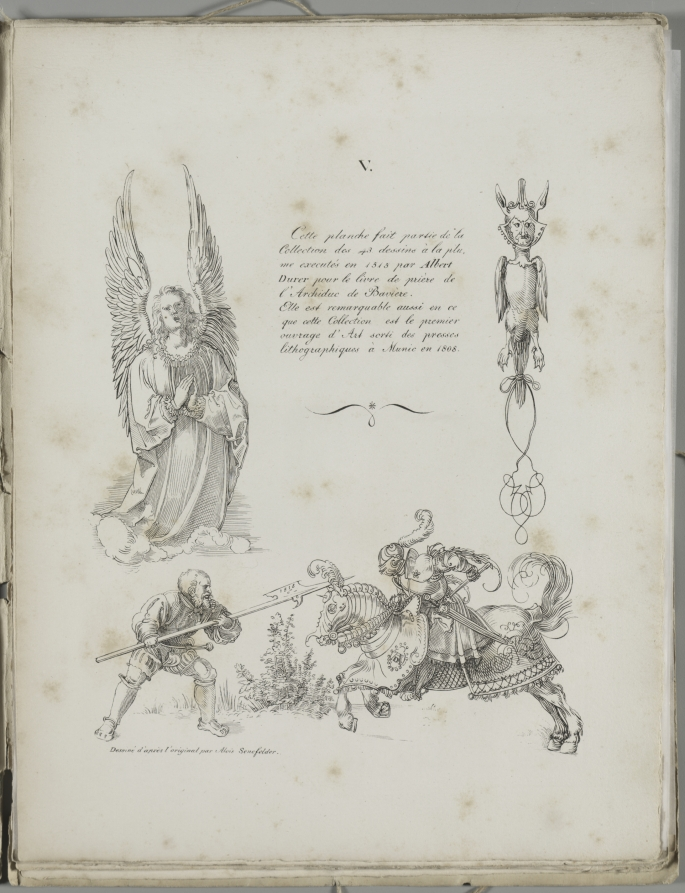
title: Art of the Lithograph: Three Designs from Dürer’s Prayer Book, Plate V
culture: Germany, 19th century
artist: Alois Senefelder (German, 1771–1834)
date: 1819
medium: lithograph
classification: Portfolio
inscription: On plate: Cette plache fait partie de la / Collection des 43 dessins a la plu- / me executés en 1515 par Albert Durer pour le livre de prière de / l’Archiduc de Bavière. / Elle est remarquable aussi en ce, / que cette collection est le premier ouvrage d’Art sorti des presses / lithographiques à Munic en 1808. Lower left: Dessiné d'apres l'original par Alois Senefelder.